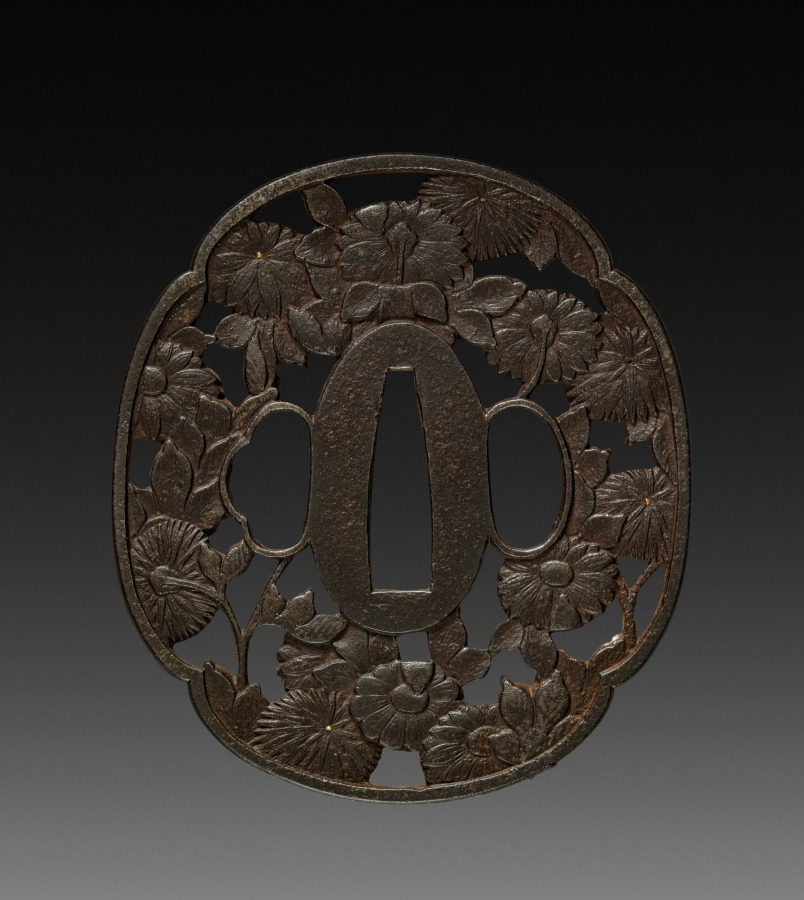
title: Sword Guard (Tsuba) with Chrysanthemums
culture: Japan, Edo period (1615–1868)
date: 1800s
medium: bronze?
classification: Metalwork